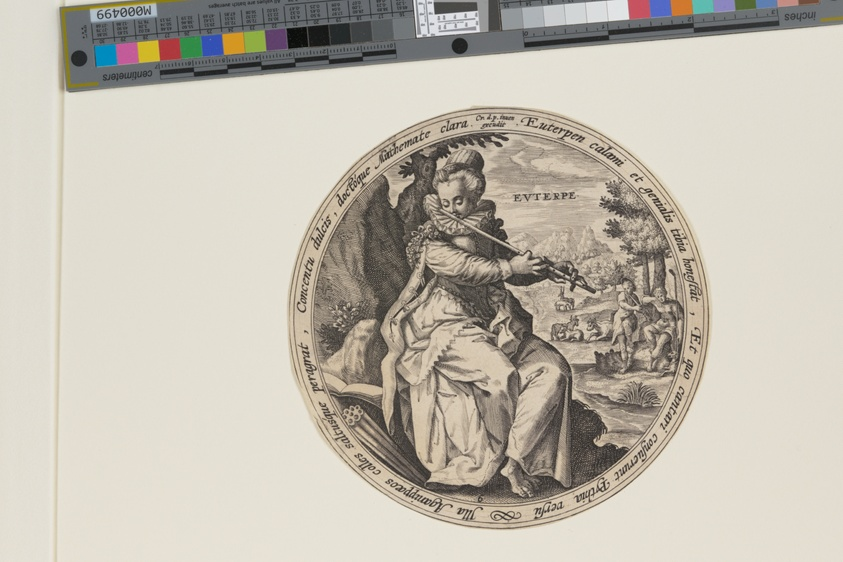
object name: Print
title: Calliope, from The Muses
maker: Crispijn van de Passe I; Dutch, c. 1565–1637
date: c. 1590-1620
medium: Engraving on ivory laid paper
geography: Netherlands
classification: engraving; paper; print; prints and drawing